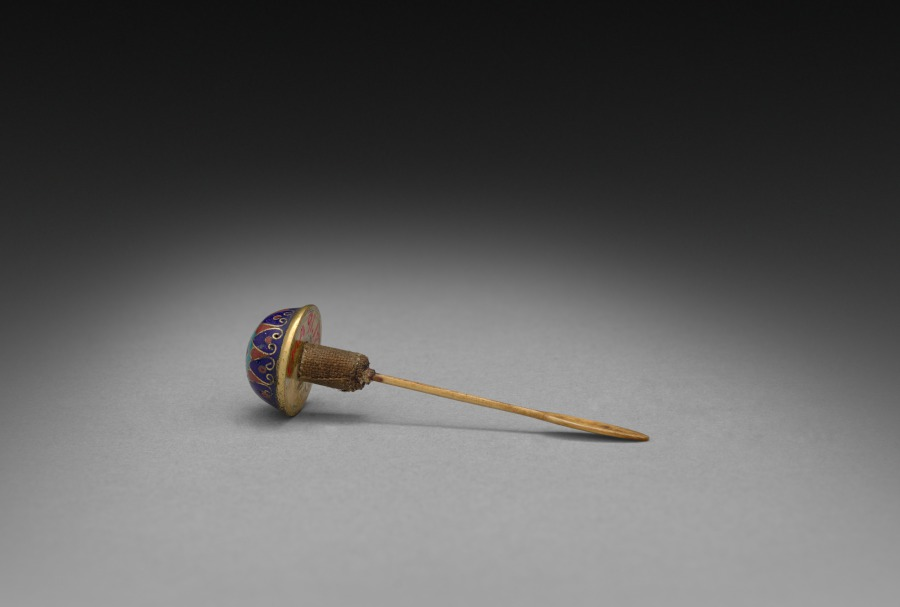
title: Snuff Bottle with Floral Scrolls (stopper)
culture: China, Qing dynasty (1644-1911), Qianlong mark and reign (1736-95)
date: 1736–95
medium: cloisonné enamel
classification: Enamel